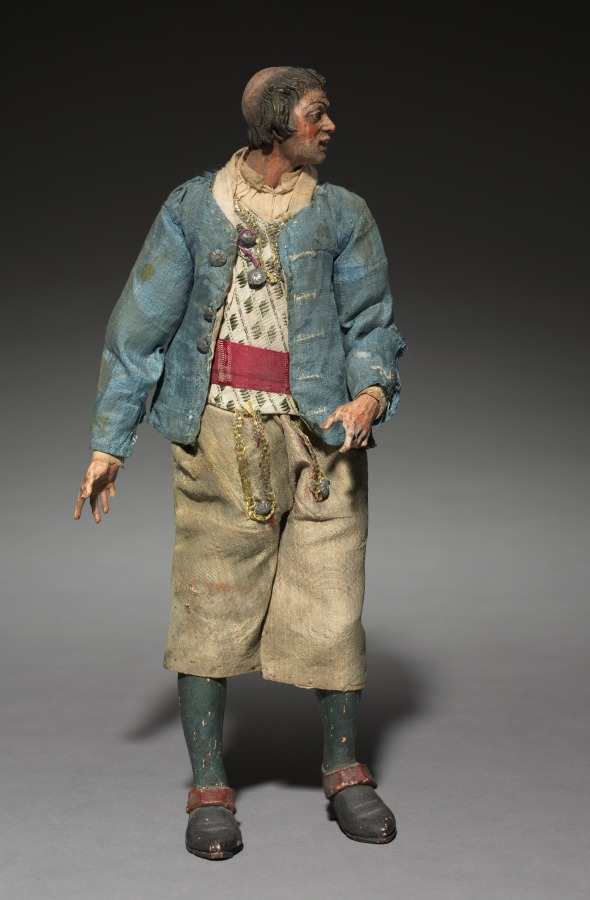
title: Figure from a Crèche: Standing Man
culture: Italy, Naples, late 18th-early 19th century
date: 1780–1830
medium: painted wood and terracotta with various textiles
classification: Sculpture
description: The practice of creating scenes of the Nativity for the home dates from the early 1700s in Italy, where people began to set up doll-like figures of about a foot or less in height. The custom was particularly popular in Naples around 1800, where crèche scenes (crèche means cradle, or crib) included many figures, whose heads and hands of painted terracotta, stuffed cloth bodies, and clothing adapted from contemporary local costumes gave them an amazingly realistic character. Representations of the birth of Jesus can be traced to the first few centuries of Christianity. Both living creatures and sculptural depictions of them were used from early times. By the late middle ages it was customary to create life-size figures of wood or stone, naturalistically painted, to represent the characters who participated in the events of Jesus's early life. These sculptures were then arranged in scenes illustrating one or both of the most important of these events, the Adoration of the Shepherds and the Adoration of the Magi—the three kings from the East who came to pay homage to the Christ child. Used in churches, these large figures were especially popular in Italy, Central Europe, Spain, and Portugal.